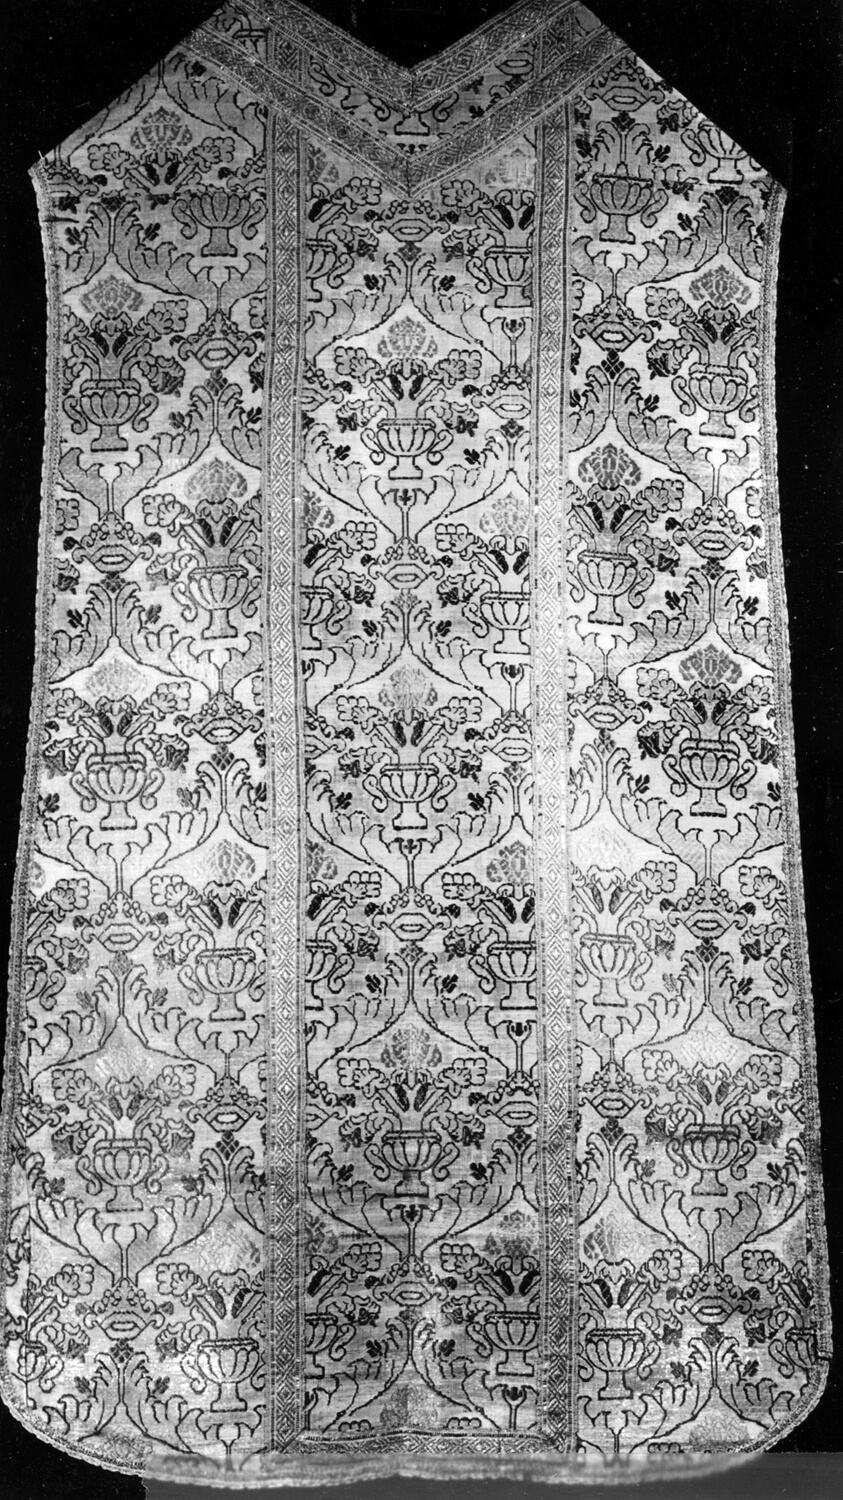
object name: Textile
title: Chasuble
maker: Italy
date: 16th century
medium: Silk, plain weave with supplementary patterning wefts and plain interlacings of secondary binding warps and silvered-metal strip supplementary facing and some supplementary patterning wefts; tapes of silk, gilt-metal strips, and gilt-metal-strip-wrapped silk, inner tape: plain weave with supplementary patterning warps; edge tape: plain weave self-patterned by warp and weft floats; lined with linen, plain weave; glazed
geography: Italy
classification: textile; weaving; costume; liturgical